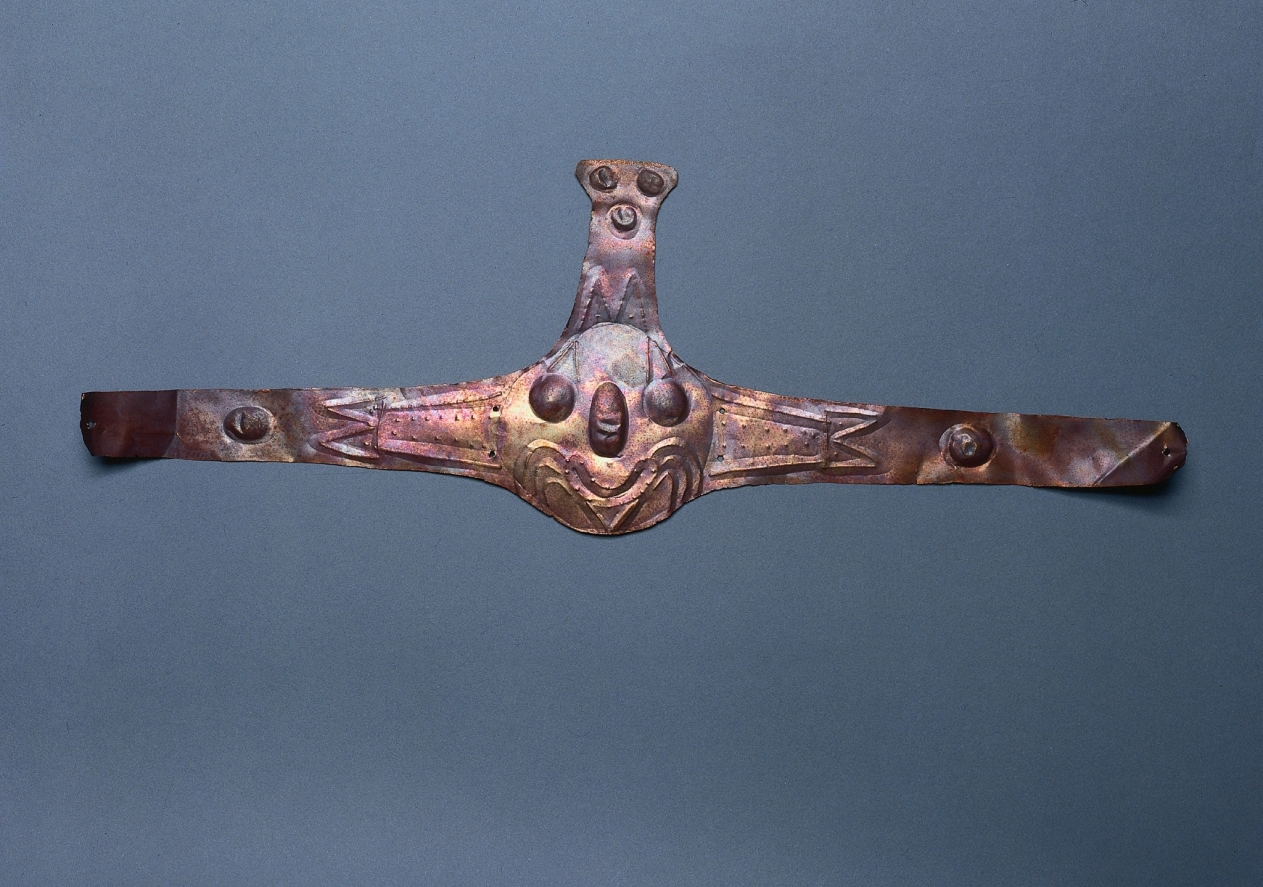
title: Forehead Ornament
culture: Peru, South Coast, Nasca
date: 100 BCE–700 CE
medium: hammered gold alloy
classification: Jewelry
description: Nasca figures, like one on a bowl nearby, are shown wearing such forehead ornaments and mouth masks similar to these. The mouth mask hung from the nasal septum, the oval opening surrounding the mouth and the bristles positioned as feline whiskers, here transformed to serpents. Both were cut from sheet gold; details were worked freehand while the sheet rested on a soft surface.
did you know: Tumbaga is an alloy made by blending gold with copper, which may give the gold a rosy hue.